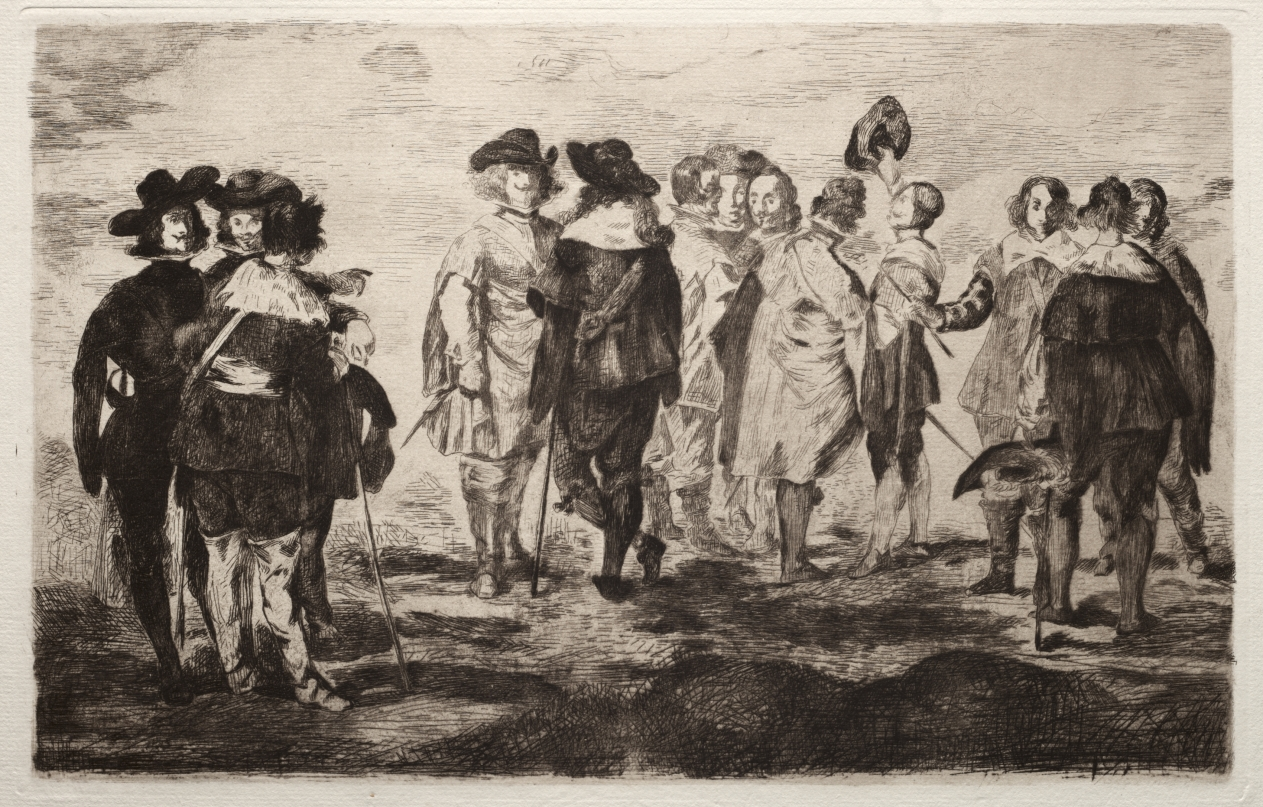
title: Les petits cavaliers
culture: France, 19th century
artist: Édouard Manet (French, 1832–1883)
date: 1860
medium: etching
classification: Print